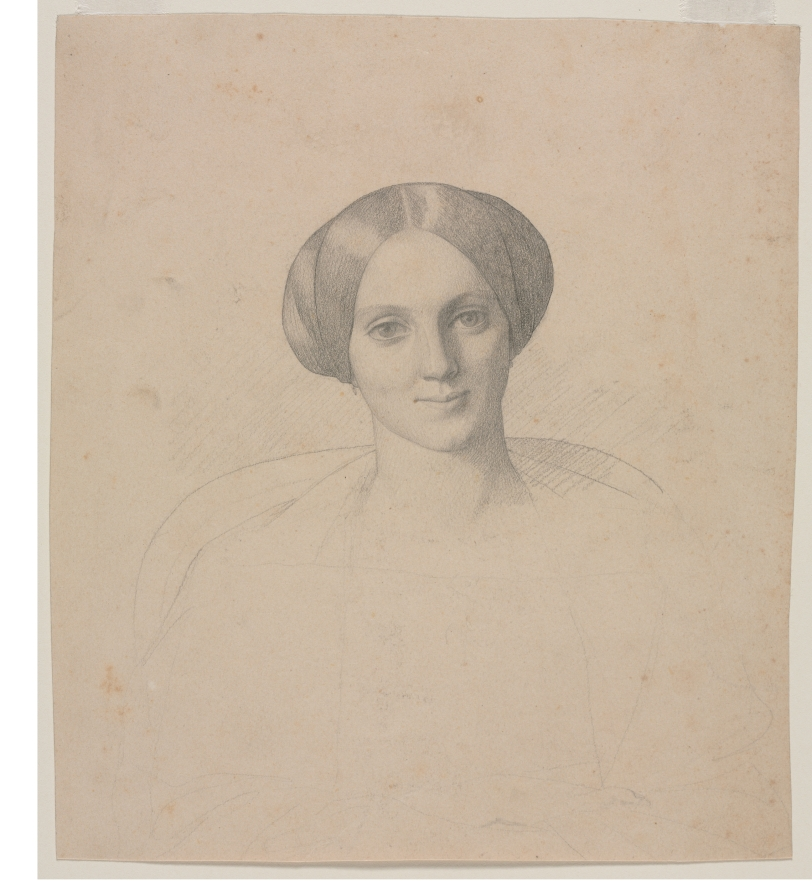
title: Portrait Head of a Woman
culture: France, 19th century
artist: Jean-Léon Gérôme (French, 1824–1904)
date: 1800s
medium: graphite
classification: Drawing